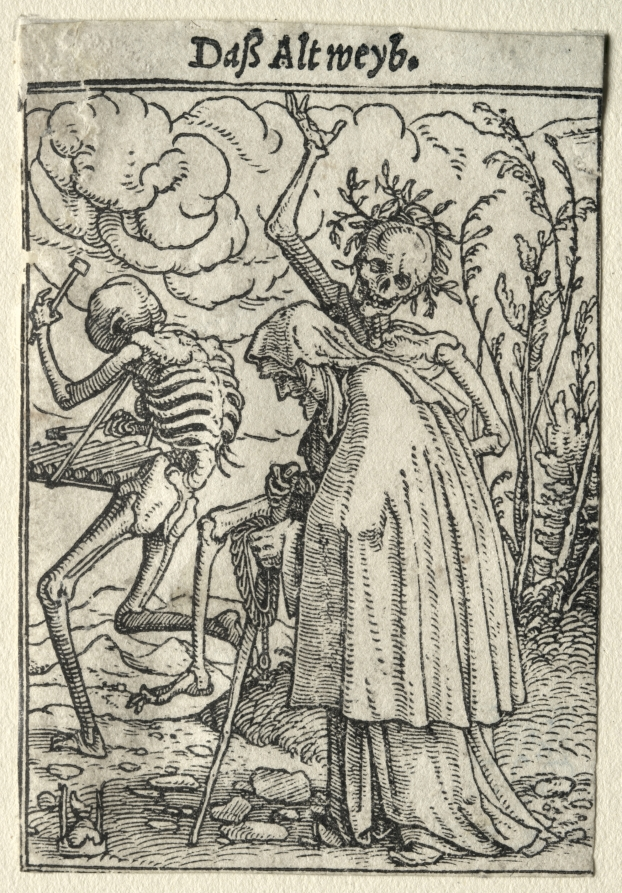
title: Dance of Death: The Old Woman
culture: Germany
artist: Hans Holbein the Younger (German, active England and Switzerland, 1497/98–1543)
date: c. 1526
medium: woodcut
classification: Print